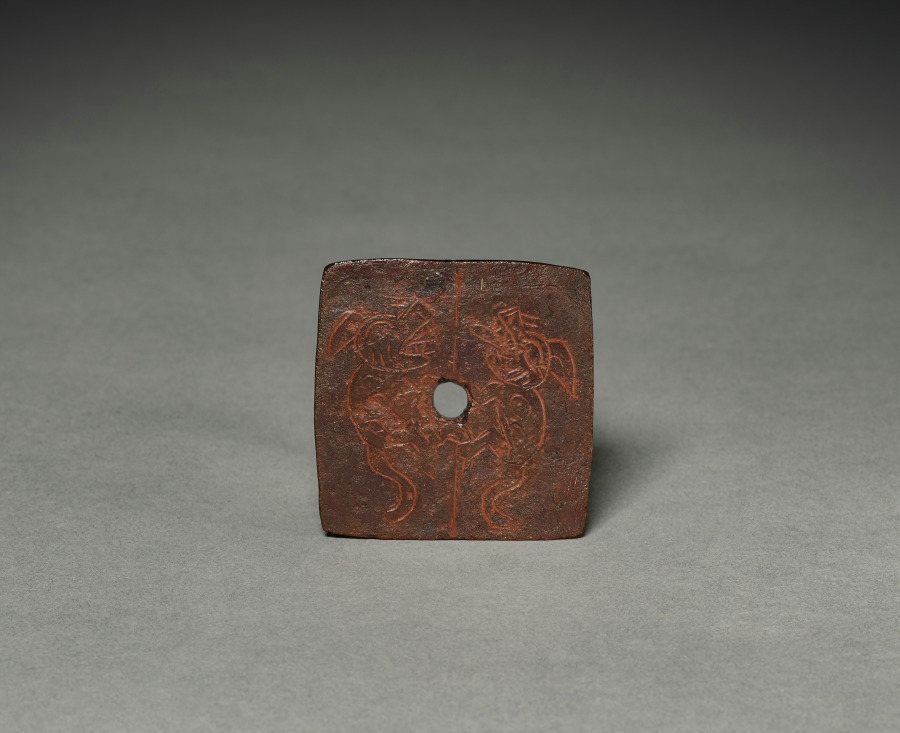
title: Male Feline-Shaped Container (lid)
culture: Peru, North Coast, Moche style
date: 50–800 CE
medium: cast copper alloy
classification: Sculpture